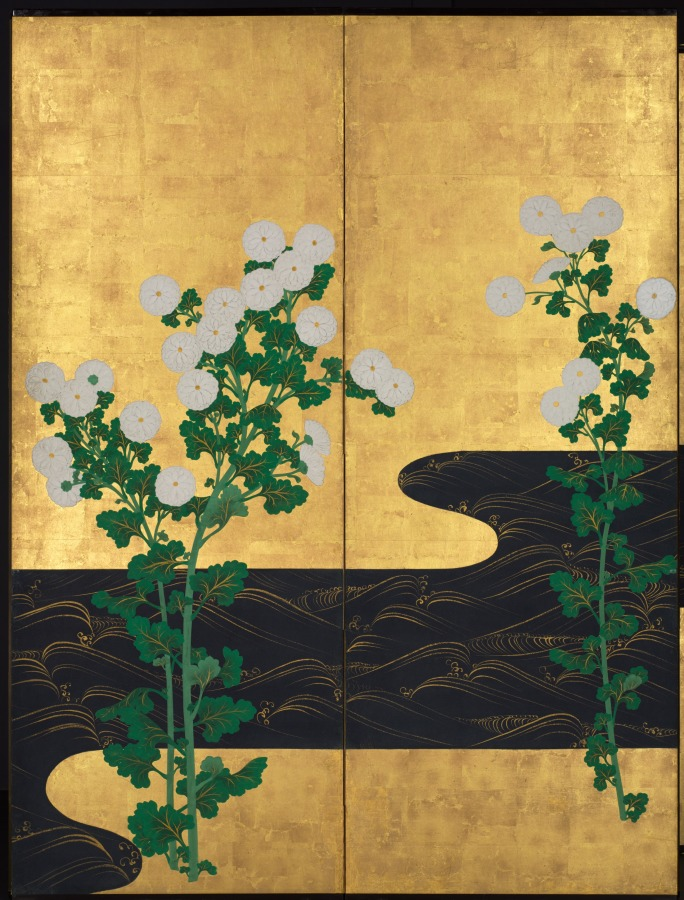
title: Chrysanthemums by a Stream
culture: Japan, Edo period (1615–1868)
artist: possibly by Ogata Kōrin (Japanese, 1658–1716)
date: c. 1715–30 or later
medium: One of a pair of six-panel folding screens; ink and color on gilded paper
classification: Painting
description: These screens recall a painting style so closely identified with Ogata Kōrin (1658–1716) that it is called Rinpa, or “Rin School,” after the ideograph “rin” in his name. The highly stylized background accentuates floral groupings that have been groomed so as to appear utterly artificial, like the synthetic arrangements available today. Kōrin's genius derived in large measure from natural phenomena painstakingly observed and then manipulated to create compositions of startling refinement and sparkling isolation. This process may have grown out of Kōrin's early immersion in the family textile business, a medium that encourages such dramatic distillations of form: the stream's gold-crested waves bring to mind traditional kimono robe designs of Kōrin's era. Works with the signature seen on this painting, including a style name, or persona suggested to Kōrin by his brother Kenzan (1663–1743), are sometimes considered to have been produced either in the last year of his life, when he was very ill, or after his death. In both scenarios, the lion’s share of the work would have been done by studio assistants, but little is truly known of his studio practice. Given the regularity of the gold waves on the stream, and the tension in the arrangement of the chrysanthemums, it is also possible that the screens were made in emulation of Kōrin's designs by a later artist.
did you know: The signature used on these screens may indicate paintings made in the last year of the artist's life, or works completed by his studio after his death.